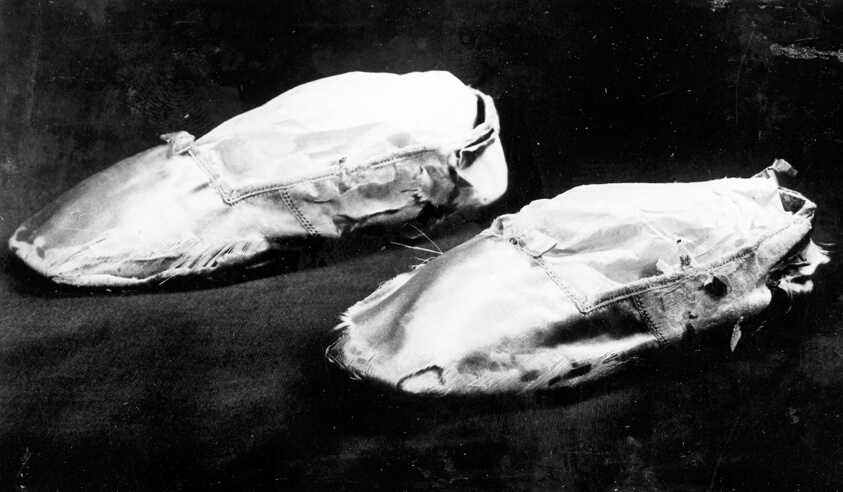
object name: Textile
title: Pair of Children's Slippers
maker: England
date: c.1840s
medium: Leather, silk, satin weave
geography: England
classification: textile; shoes - misc; costume accessory - shoe; costume; dress (garment); clothing